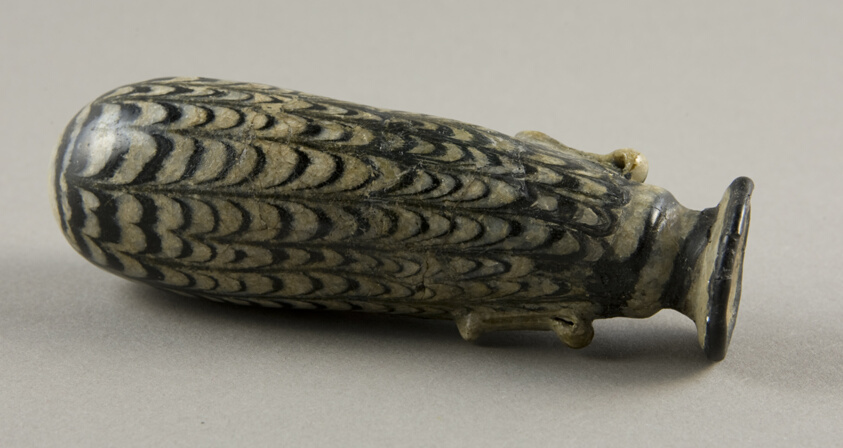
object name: Vessel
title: Alabastron (Container for Scented Oil)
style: ancient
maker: Ancient Mediterranean; Alexandria, Egypt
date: 6th-4th century BCE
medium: Glass, core-formed technique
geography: Mediterranean Region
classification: glass; vessel; ancient art